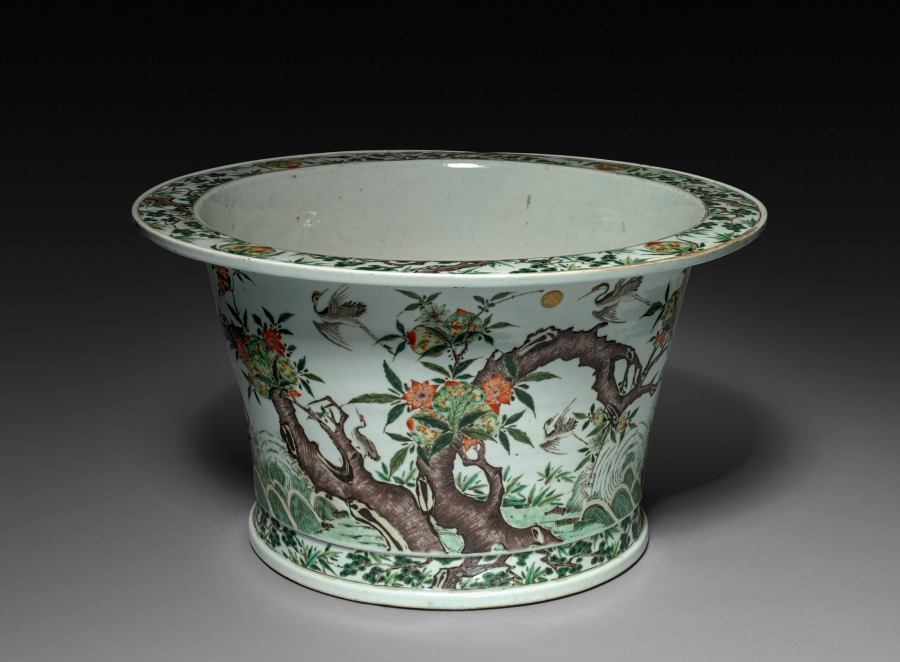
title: Jardiniere with Cranes and Peaches over Waves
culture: China, Jiangxi province, Jingdezhen kilns, Qing dynasty (1644-1911), Kangxi reign (1661-1722)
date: 1662–1722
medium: porcelain with famille verte overglaze enamel decoration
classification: Ceramic